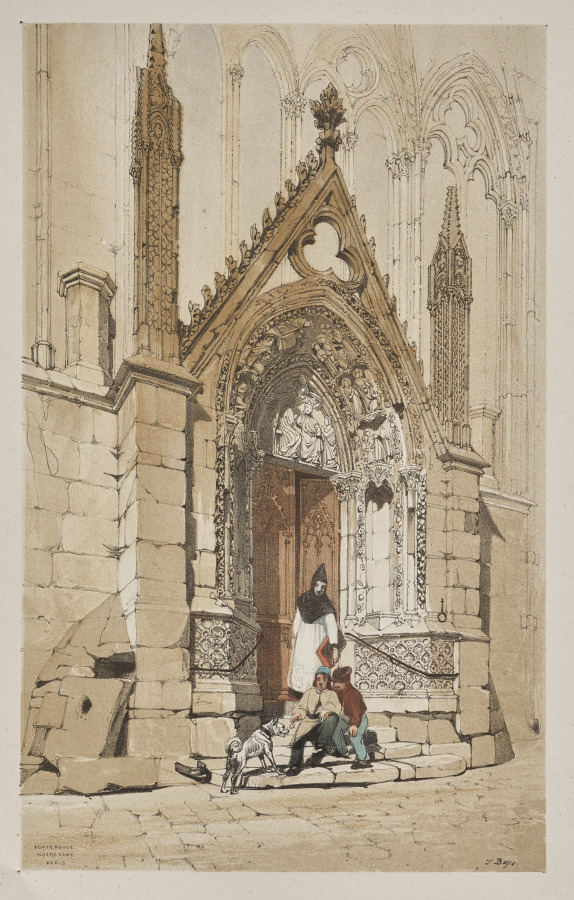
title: Picturesque Architecture in Paris, Ghent, Antwerp, Rouen: Porte Rouge, Nôtre Dame, Paris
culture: England, 19th century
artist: Thomas Shotter Boys (British, 1803–1874)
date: 1839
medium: lithograph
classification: Portfolio